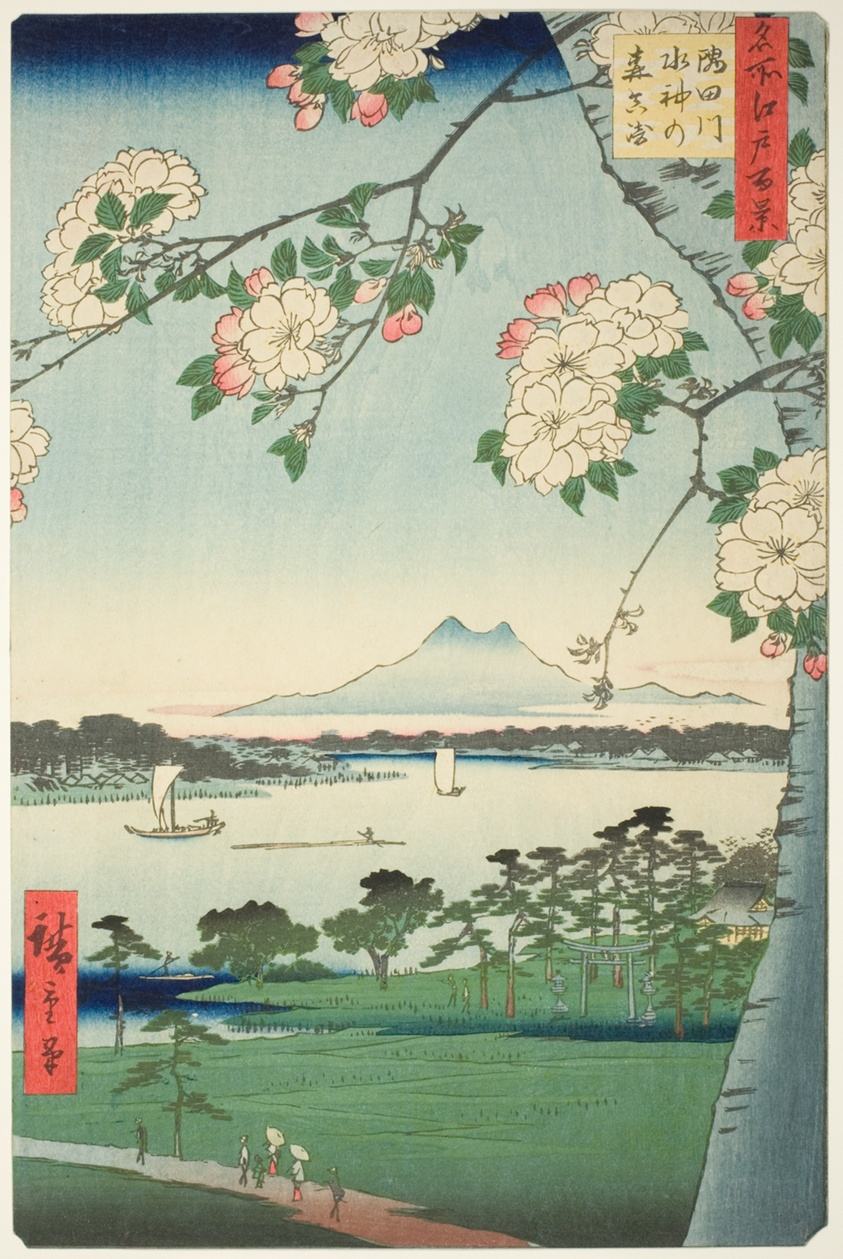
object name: Print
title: Suijin Shrine and Massaki on the Sumida River (Sumidagawa Suijin no mori Massaki), from the series "One Hundred Famous Views of Edo (Meisho Edo hyakkei)"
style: Japanese (culture or style)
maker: Utagawa Hiroshige 歌川 広重; Japanese, 1797-1858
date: 1856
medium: Color woodblock print; oban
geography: Japan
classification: woodblock print; print; asian art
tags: landscapes